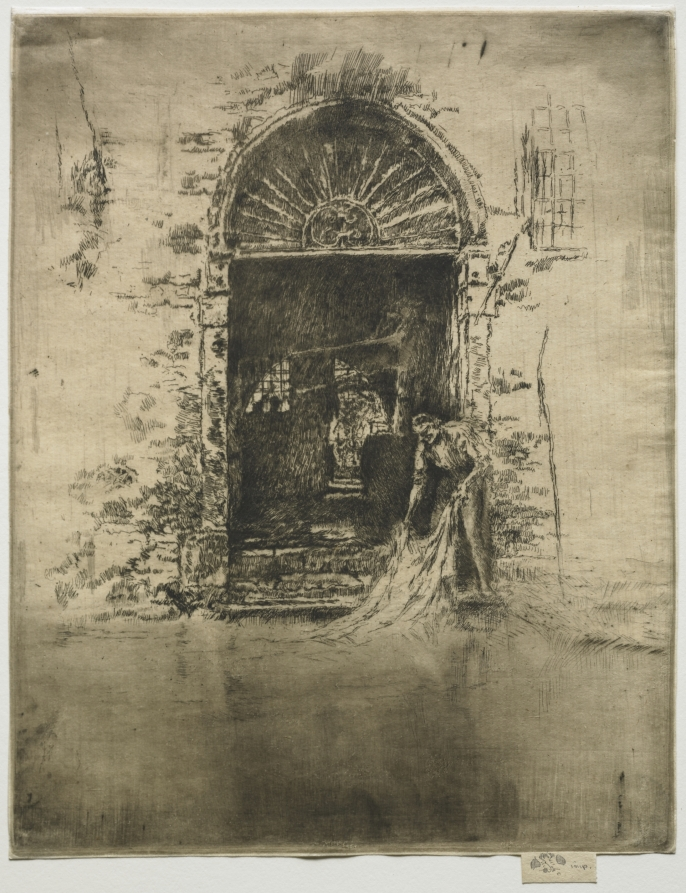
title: The Dyer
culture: America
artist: James McNeill Whistler (American, 1834–1903)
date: 1879–80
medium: etching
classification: Print